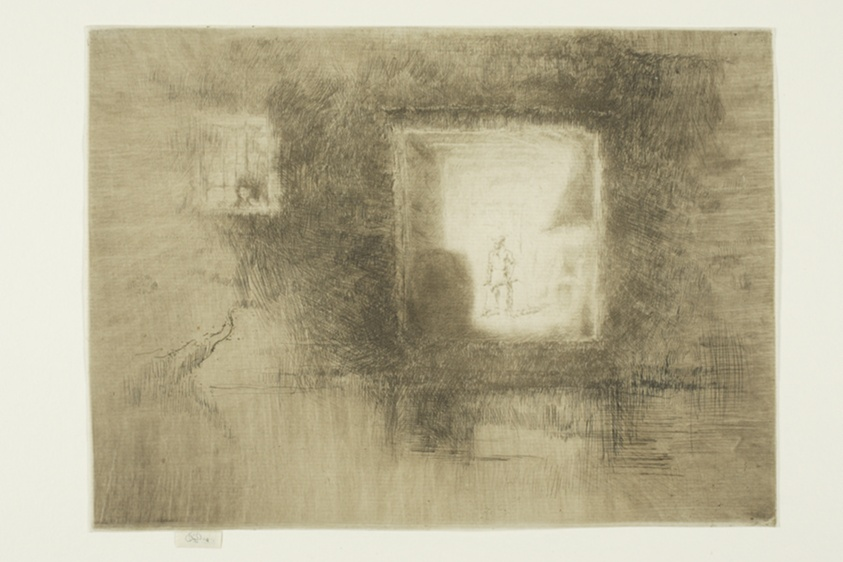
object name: Print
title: Nocturne: Furnace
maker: James McNeill Whistler (American, 1834-1903)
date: 1879/80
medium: Etching and drypoint with foul biting in dark brown ink on cream laid paper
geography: United States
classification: etching; foul biting; print; prints and drawing; drypoint; paper